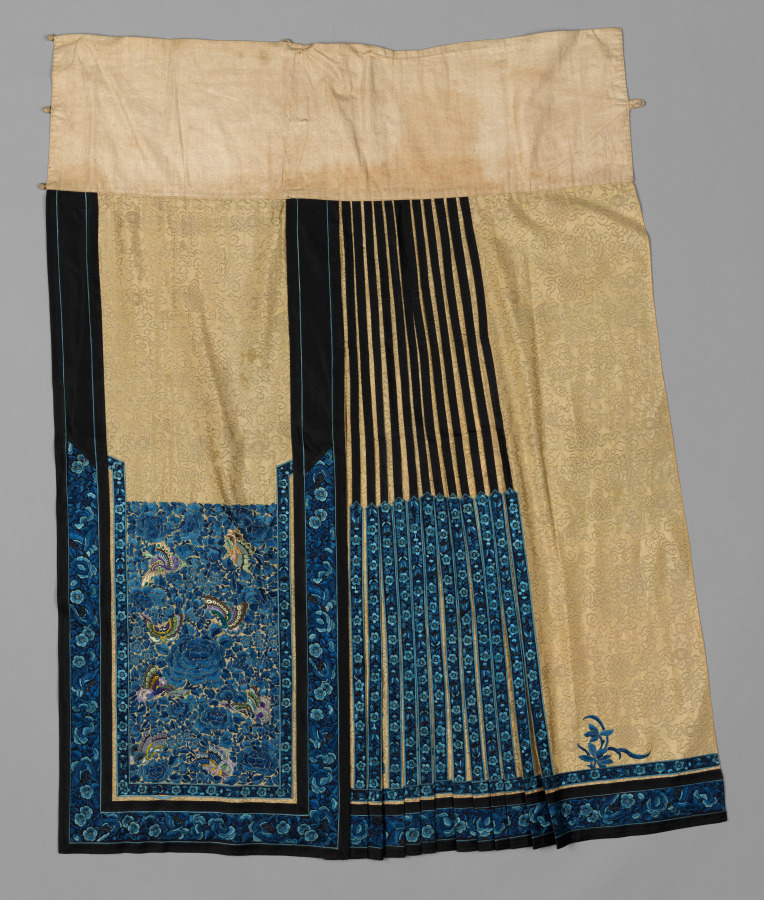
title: Skirt (Part 2)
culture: China, Qing dynasty (1644–1911)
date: late 1870s–early 1880s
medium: Silk, embroidery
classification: Garment